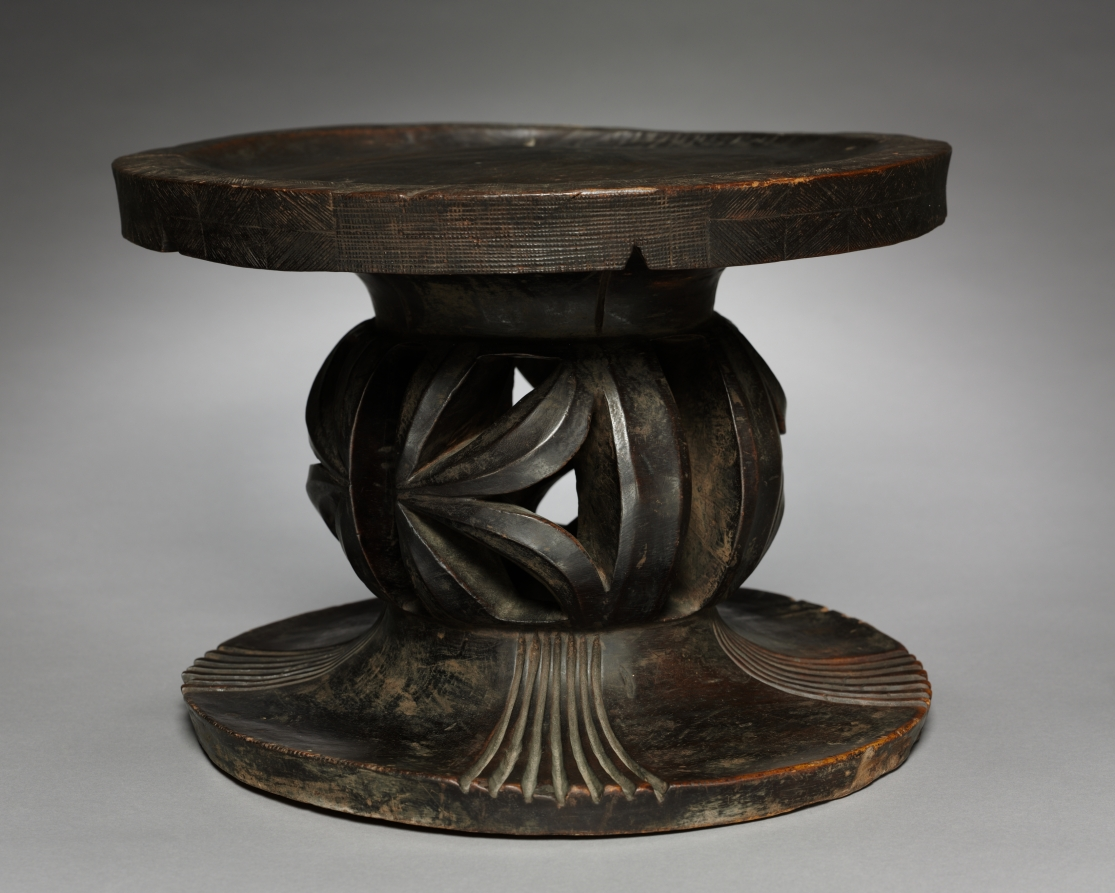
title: Stool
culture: Africa, Central Africa, Democratic Republic of the Congo, Mangbetu-style maker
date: by 1928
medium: wood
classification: Furniture and woodwork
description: Such stools were highly prized by their female owners. Sculpted by master artists with widespread reputations, they were often "signed" with a deeply cut mark on the base. This groove was then filled with red camwood as an expression of blessings and good wishes for the stool's owner.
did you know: In 1928, Paul Travis photographed the Mangbetu queen who once owned this stool as she sat on it.